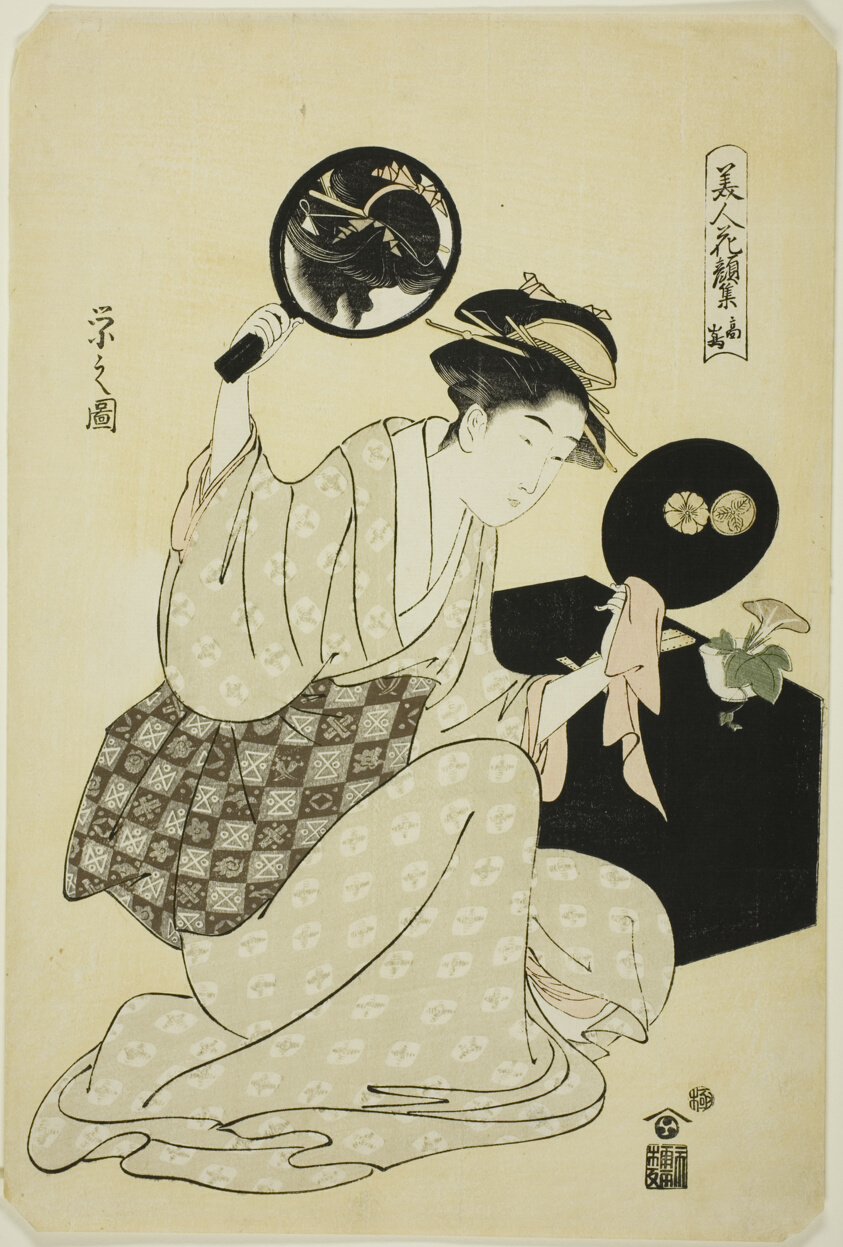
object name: Print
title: Takashima, from the series "A Collection of Flower-like Faces of Beauties (Bijin kagan shu)"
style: Japanese (culture or style)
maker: Chobunsai Eishi; Japanese, 1756-1829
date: late 18th/early 19th century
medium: Color woodblock print; oban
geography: Japan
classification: print; asian art